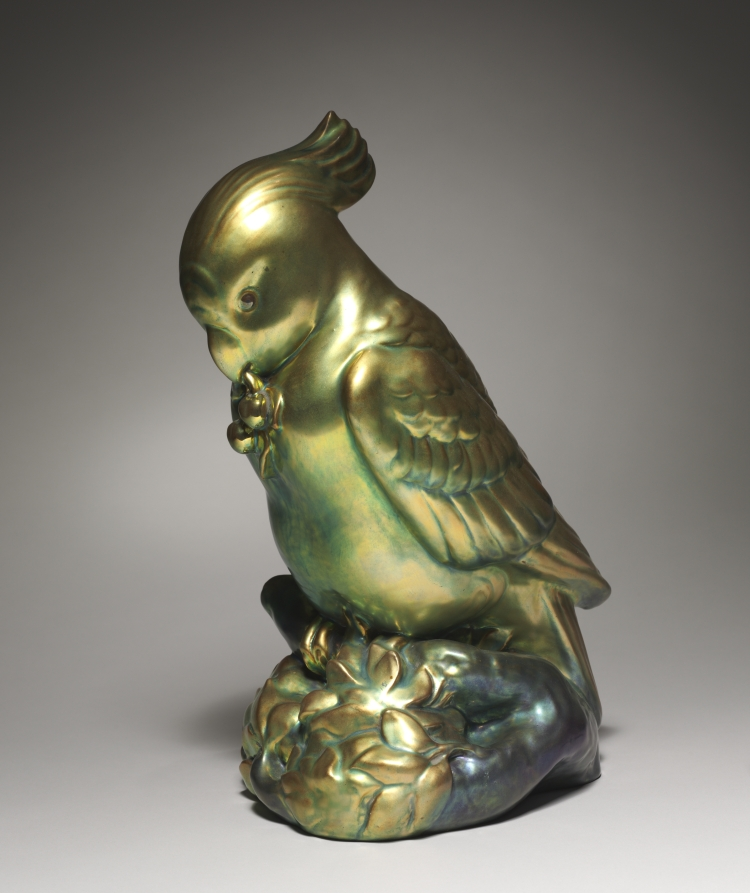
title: Parrot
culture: Hungary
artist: Zsolnay Factory (Hungarian)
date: c. 1910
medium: earthenware with lustre glazes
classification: Ceramic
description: This parrot's distinctive metallic sheen is achieved through a technique known as luster glazing, in which ground metals, typically silver, gold, or platinum, are incorporated into the glazing process. The parrot is decorated with green-gold luster, while the base is decorated with blue-purple-gold luster.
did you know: The glaze technique on this parrot is eosin, which takes its name from Eos, the Greek goddess of dawn.